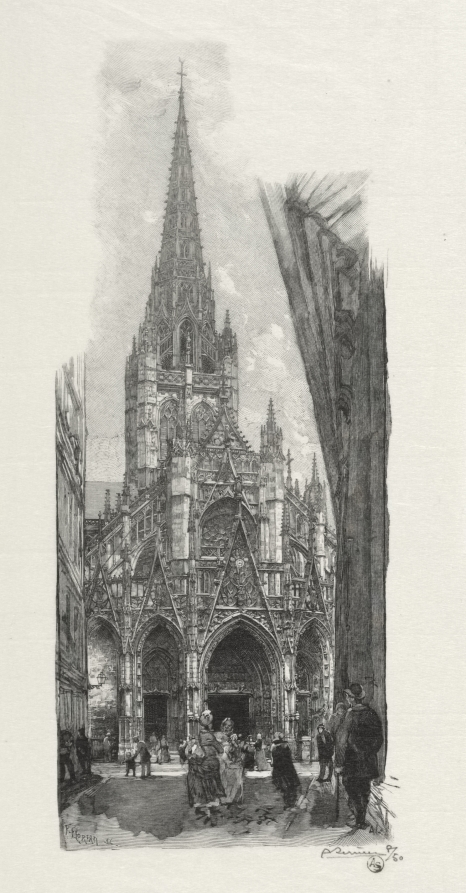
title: Rouen Illustré: Eglise Saint Maclon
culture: France, 19th century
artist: Auguste Louis Lepère (French, 1849–1918)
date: 1896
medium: wood engraving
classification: Print